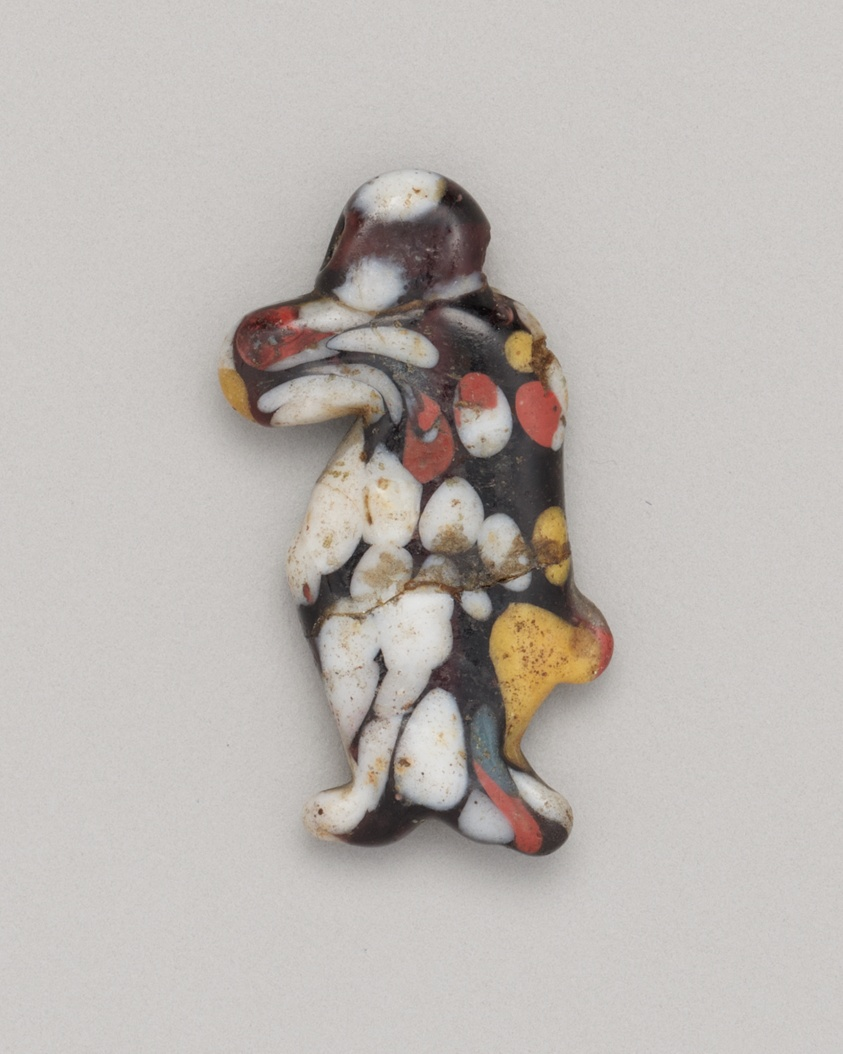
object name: Costume and Accessories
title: Taweret Amulet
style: egyptian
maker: Egyptian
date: New Kingdom, Dynasty 18, reign of Akhenaten (about 1352–1336 BCE)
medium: Mosaic glass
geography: Egypt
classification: amulet; glass; jewelry; ancient art; costume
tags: goddesses